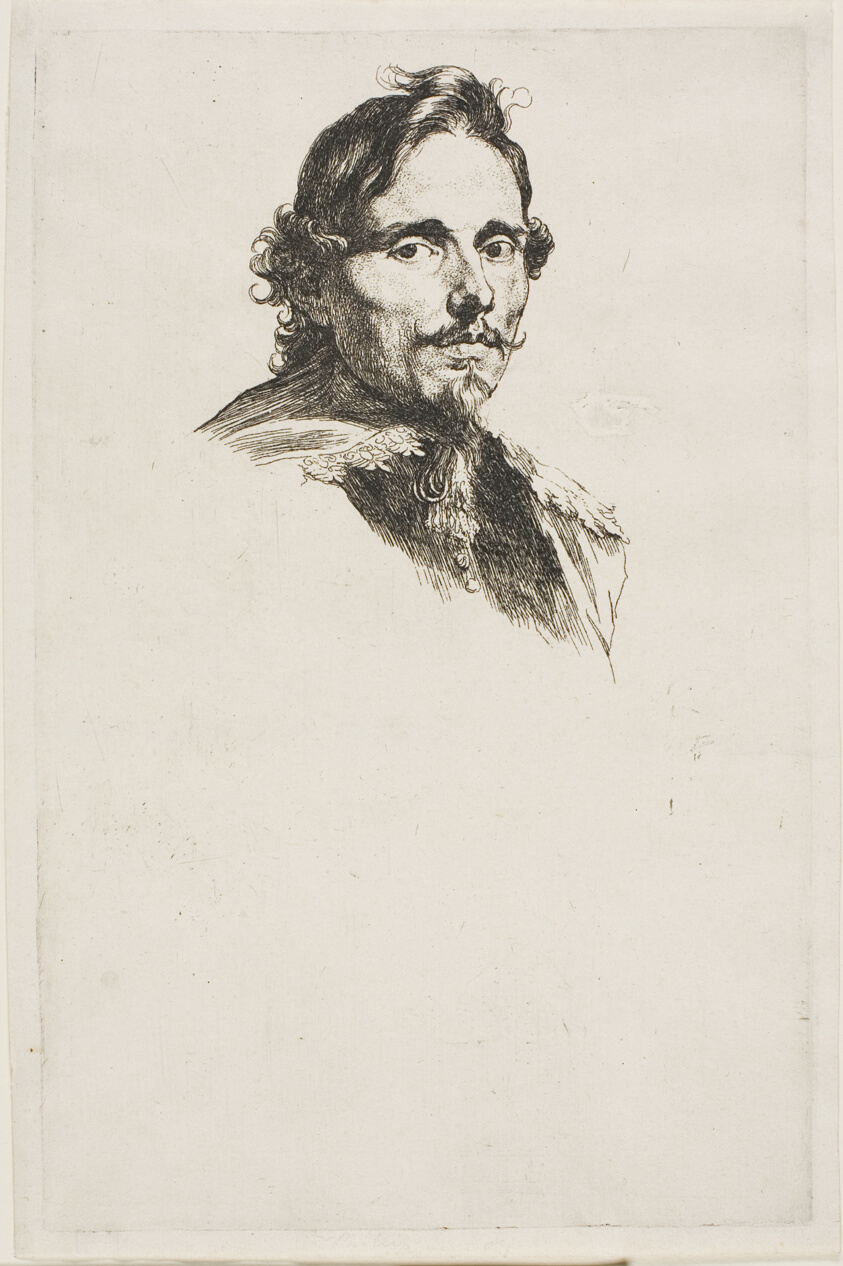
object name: Print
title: Philippe Le Roy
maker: Anthony van Dyck (Flemish, 1599-1641)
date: 1630/40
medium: Etching, with stippling, in black on ivory laid paper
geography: Flanders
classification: etching; print; prints and drawing